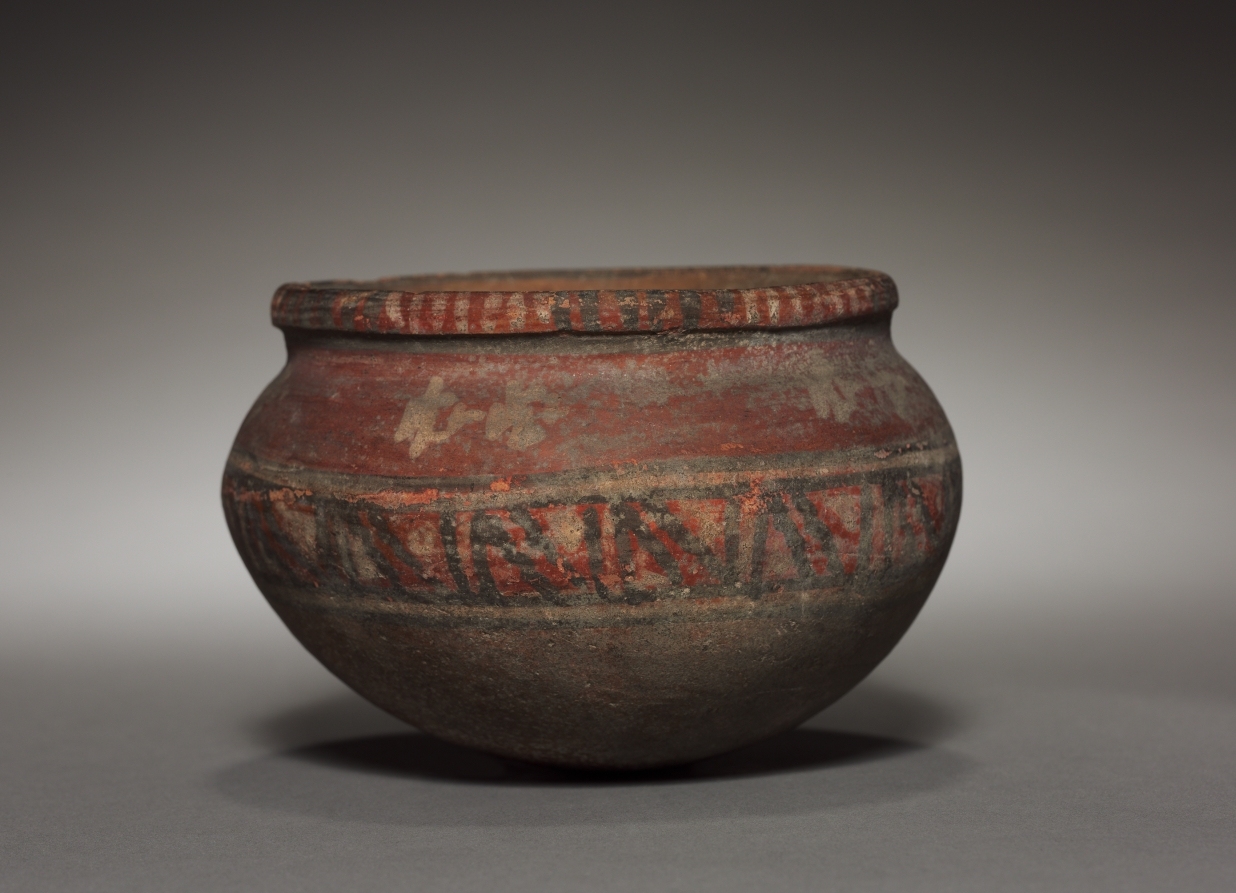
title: Bowl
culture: Peru, South Coast, 10th-11th century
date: 900–1100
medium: pottery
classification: Ceramic